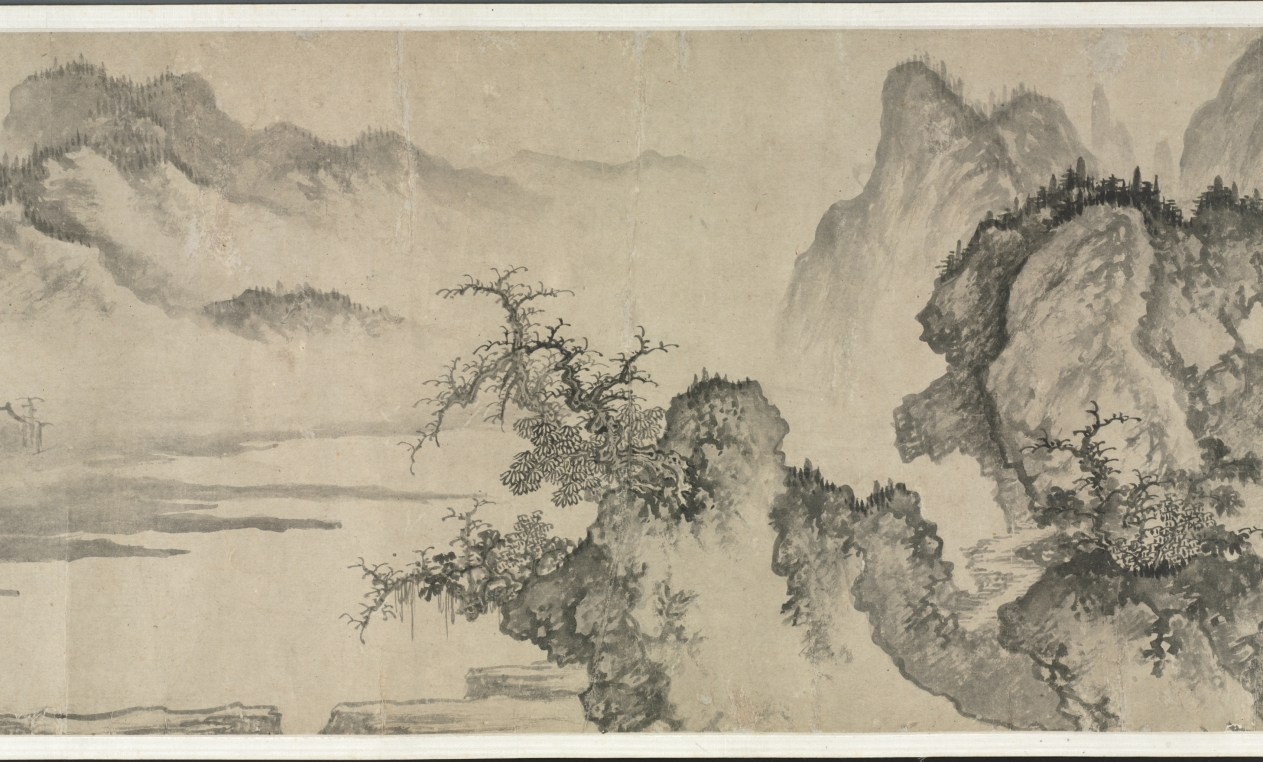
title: Buddha's Conversion of Five Bhiksu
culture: China, Yuan dynasty (1271–1368)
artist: Li Sheng (Chinese, active c. 1324–after 1375)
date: mid-1300s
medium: handscroll; ink on paper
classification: Painting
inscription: 紫篔生李升識 [印] 李氏子雲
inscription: 4 colophons and 12 additional seals: The "Heart" Sutra (Maha Prajnaparamita) text written by Wu Yuqing 吳餘慶 (active early 1400s); 2 seals of Xu Qianxue 徐乾學 (1631–1694); 3 colophons, one dated 1929 and two dated 1936, and 9 seals of Wu Hufan 吳湖帆 (1894–1968); 1 colophon, dated 1932, of Chen Dingshan; 1 seal unidentified.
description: This episode stems from the life of the historical Buddha, who, after his enlightenment, was initially hesitant about preaching his own doctrine. After much personal deliberation and prodding by deities, he finally relented. The first converts were the five guards who served him when he was still a prince. For Li Sheng, this is the pretext of the painting, which moves from the interaction of the bhiksu with the Buddha to a broader awareness of the vast surroundings of the scene.